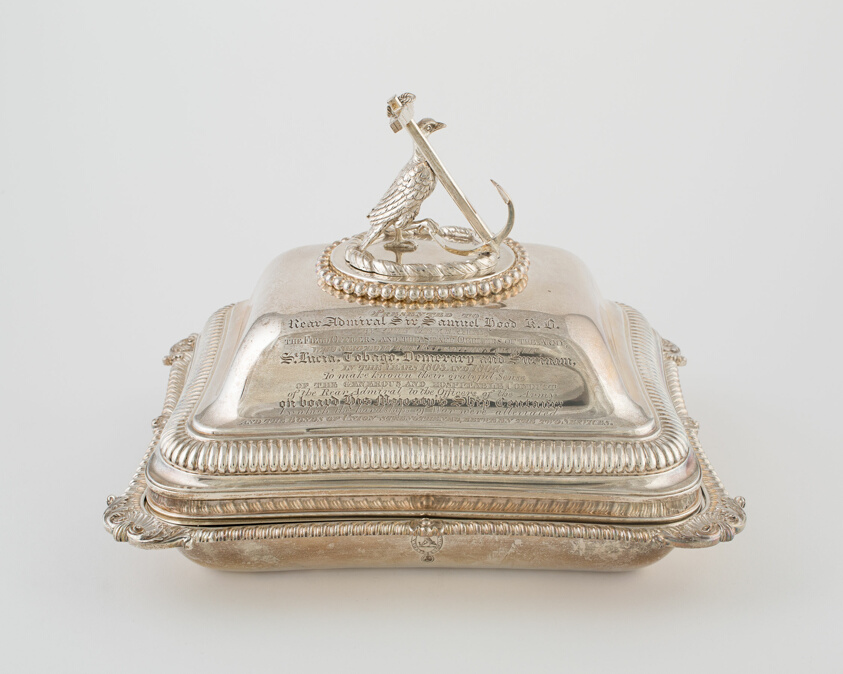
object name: Metalwork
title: Entree Dish with Cover from the Hood Service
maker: Paul Storr; English, 1771-1844; London, England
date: 1806/07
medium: Sterling silver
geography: London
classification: dish (vessel); silver; metalwork; european decorative arts